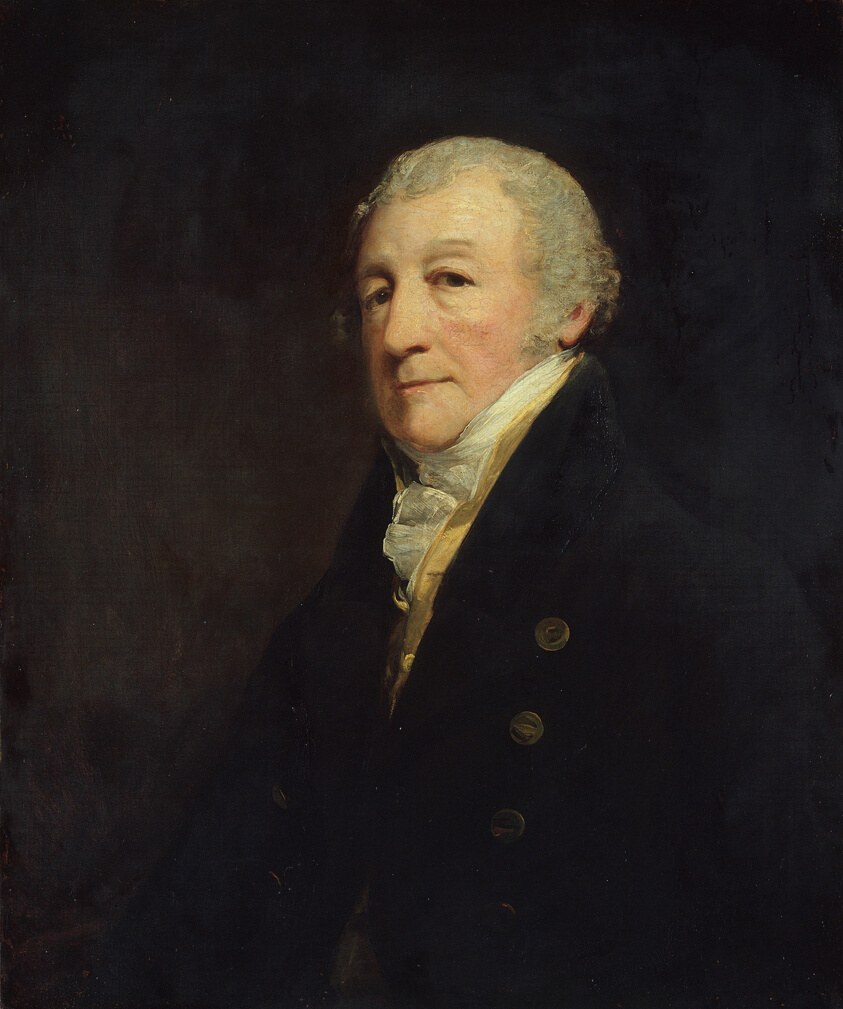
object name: Painting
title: Portrait of the Artist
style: nineteenth century, 19th century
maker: John Baptist (English, 1778-1831)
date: c. 1820/30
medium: Oil on canvas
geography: England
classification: painting; british; oil on canvas; oil paintings (visual works); paint; european painting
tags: portraits: male subject, black (color), man, men, artist, portraits, portrait